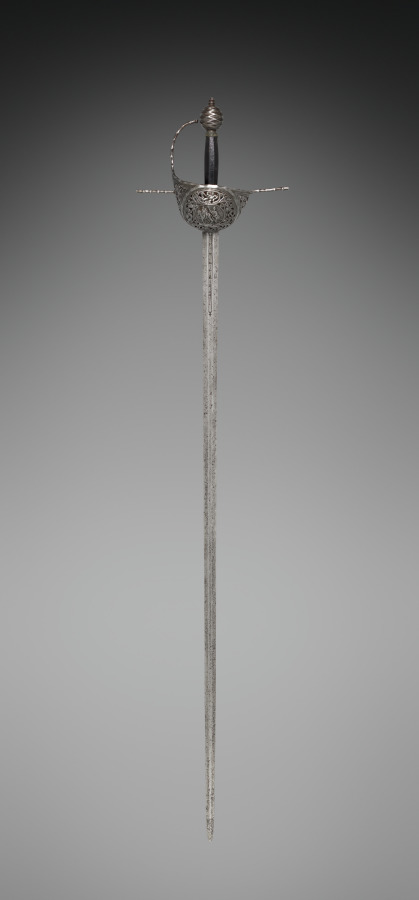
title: Cup-Hilted Rapier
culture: Italy, Milan?, 17th century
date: c.1610–30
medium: steel, pierced, chased and chiseled; wire ferrules on leather-covered wood grip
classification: Arms and Armor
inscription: inscribed on blade: FPNDRITH (on one face) RDFTPHNI (on the other)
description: The rapier was a sword worn with civilian dress and used in duels. The term rapier derives from a 16th-century French word rapière, which in turn derived from the Spanish espada ropera, or “dress sword.” The rapier was a light weapon with a straight double-edged and pointed blade that, with the development of the art of fencing in the 1500s and 1600s, gradually became narrower and lighter, and thus suitable for thrusts only. With the new technique of swordplay emphasizing the point of the blade, sword guards became more complex to protect the duelist’s unarmored hand. These elaborate guards were frequently decorated by various techniques—chiseling, bluing, russeting, and damascening.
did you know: Over time the blade of a rapier became longer, based on a belief that a longer blade made it easier to hit one's adversary and, at the same time stay beyond the reach of his weapon.